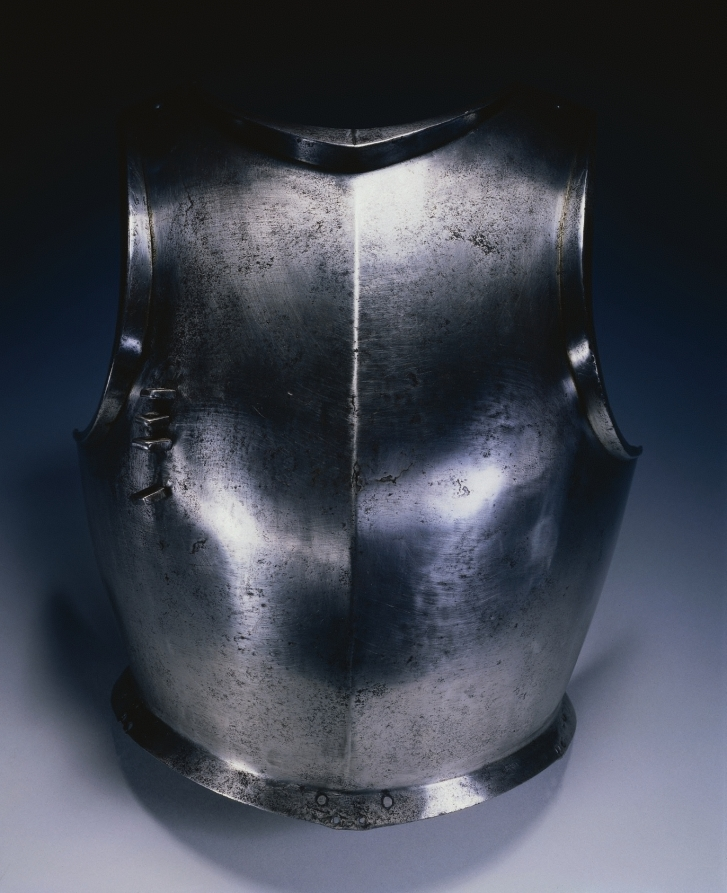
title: Gothic Breastplate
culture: Italy, late 15th Century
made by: possibly by Domenico dei Barini (Italian, 1492-c. 1516)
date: c. 1490–1500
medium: steel (with Lance Rest Mount)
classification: Arms and Armor